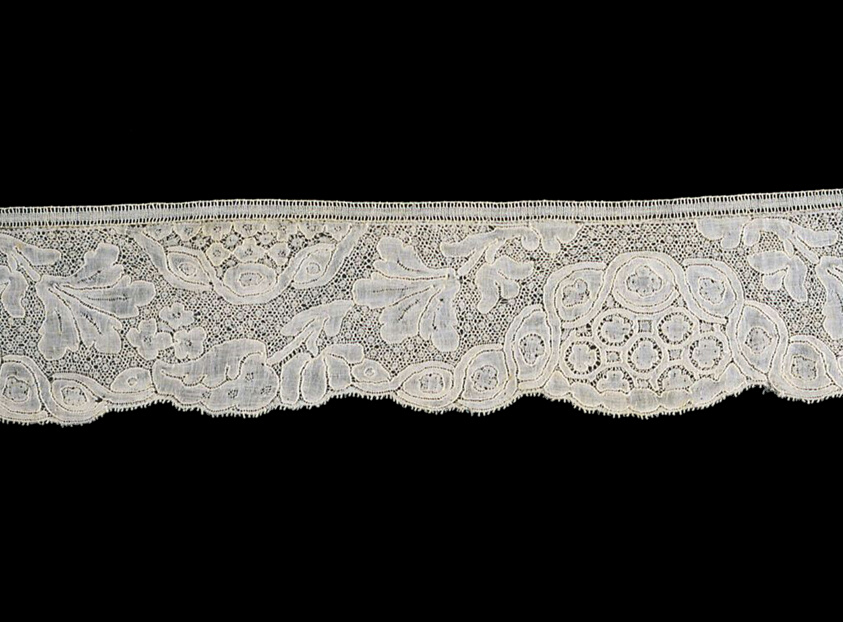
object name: Textile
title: Border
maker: Belgium, Flanders, Mechlin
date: 1740s/50s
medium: Linen, bobbin straight lace of a type known as "Mechlin" with kat stitch and snowflake mesh ground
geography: Mechelen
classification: textile; lace - bobbin